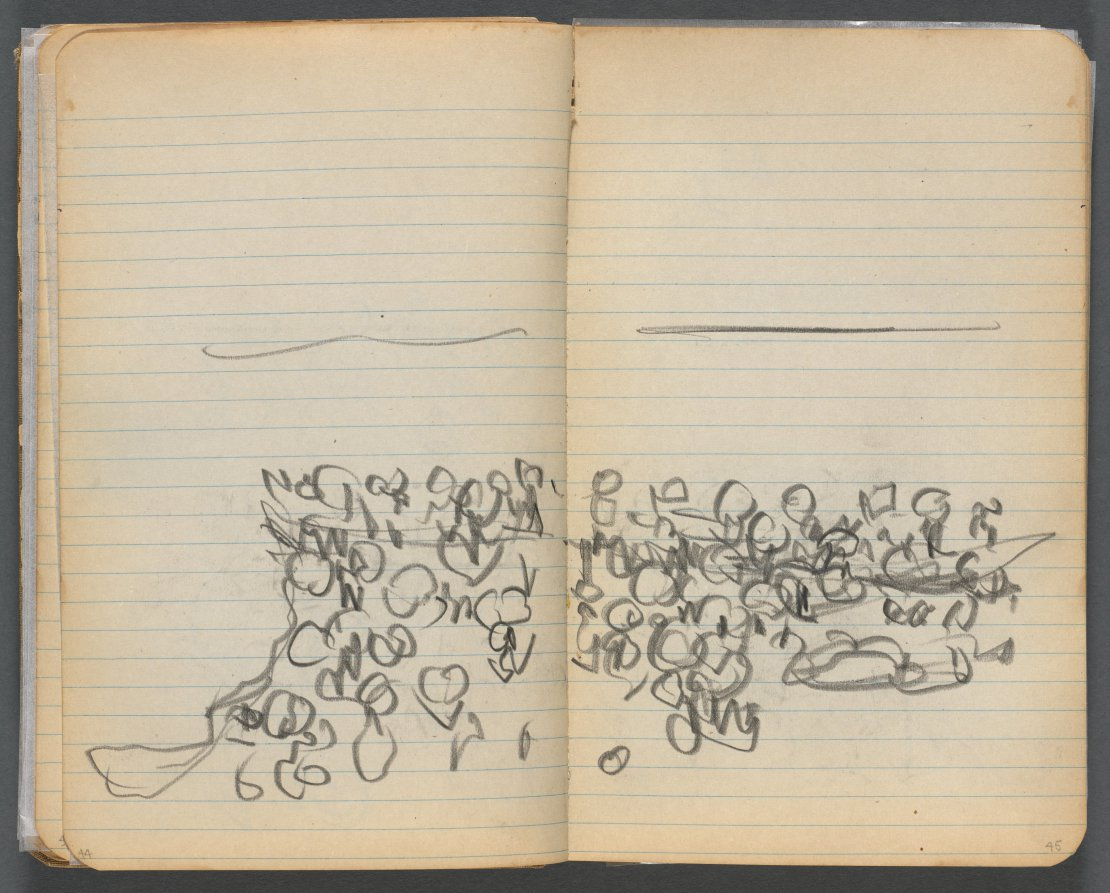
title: Sketchbook, page 044 & 45: Beach View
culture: America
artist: Maurice Prendergast (American, born Newfoundland [now Canada], 1858–1924)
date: 1905–10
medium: graphite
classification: Bound Volume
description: This sketchbook contains 69 pages of drawings, a diary largely devoted to the state of the artist's health, and a three-page discourse on the nature of genius and ideas.